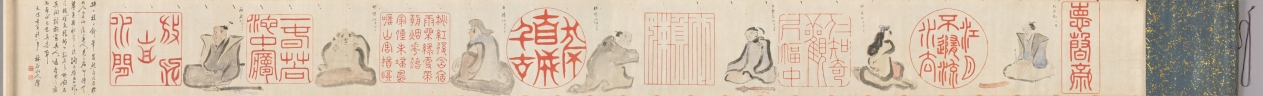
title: Chinese Seals and Poets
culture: Japan, Edo period (1615–1868)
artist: Hosokawa Rinkoku (Japanese, 1779–1843)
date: 1842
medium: handscroll; ink and color on paper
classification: Painting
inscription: Eight seal impressions are painted in red and alternate with sketchily painted figures. Artist's colophon at end of scroll.